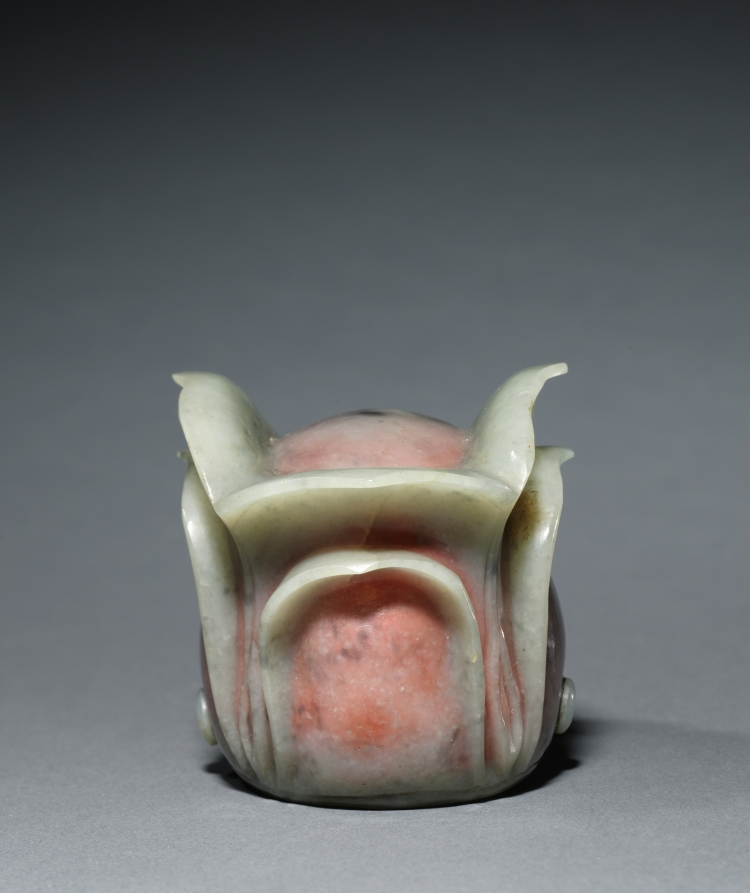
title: Daoist Cap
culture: China, Song dynasty (960-1279) - Yuan dynasty (1271-1368)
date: 960–1279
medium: grayish-green jade with brown and black markings; interior with pink pigment and gold inlays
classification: Jade